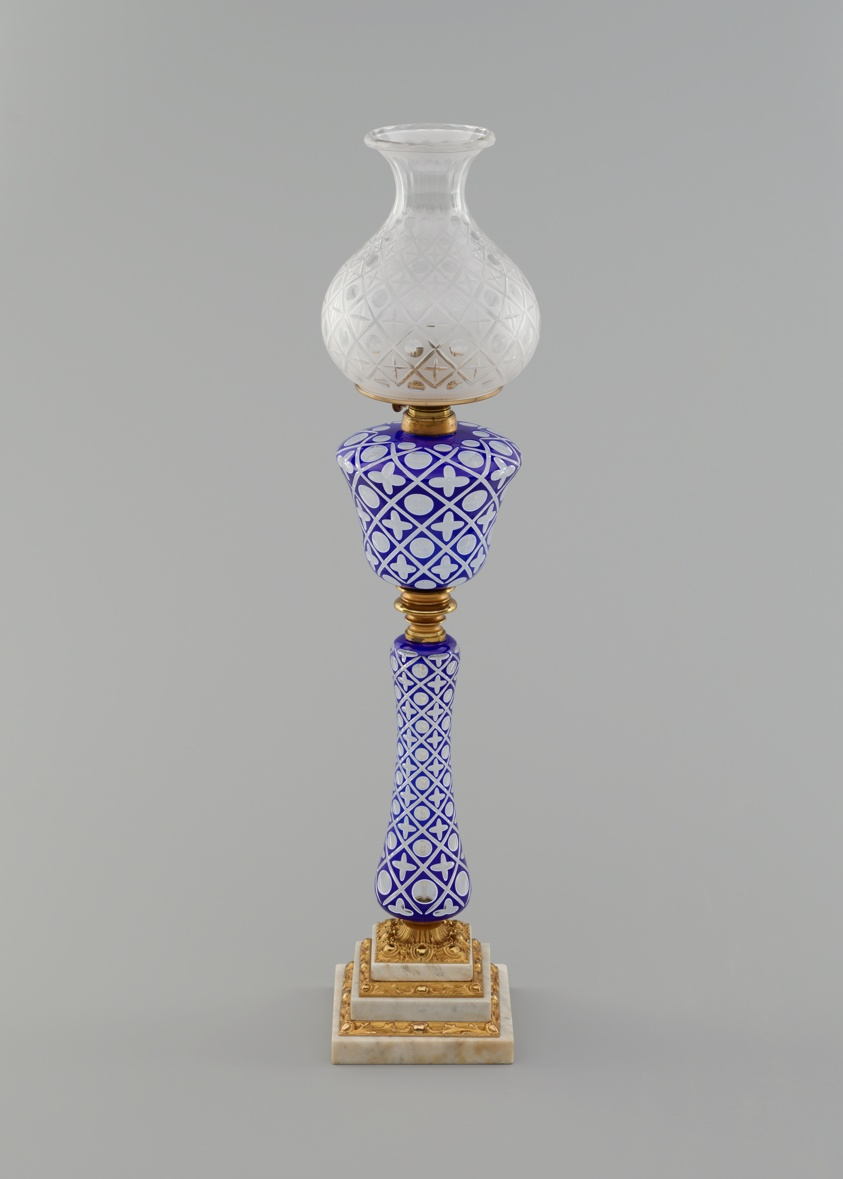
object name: Glass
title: Double-Plated Lamp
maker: Boston and Sandwich Glass Company (American, 1825–1888); Sandwich, Massachusetts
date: c. 1865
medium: Cobalt blue, opaque white, and clear glass, gilt bronze, and marble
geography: Sandwich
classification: lamp (lighting device); glass; american decorative arts; american arts; decorative arts